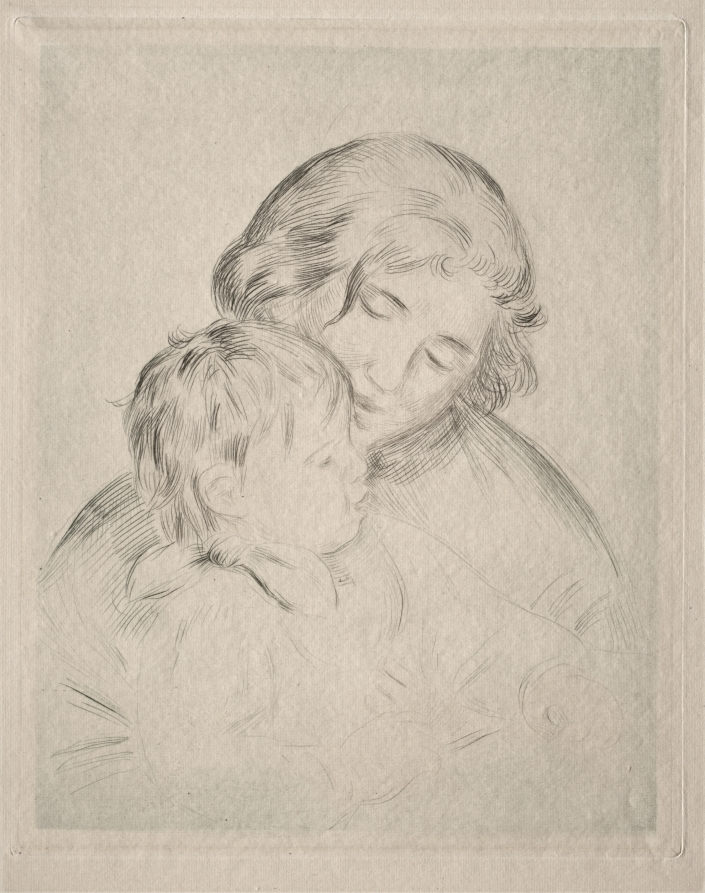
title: Mother and Child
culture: France, late 19th-early 20th century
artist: Pierre-Auguste Renoir (French, 1841–1919)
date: 1896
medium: etching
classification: Print